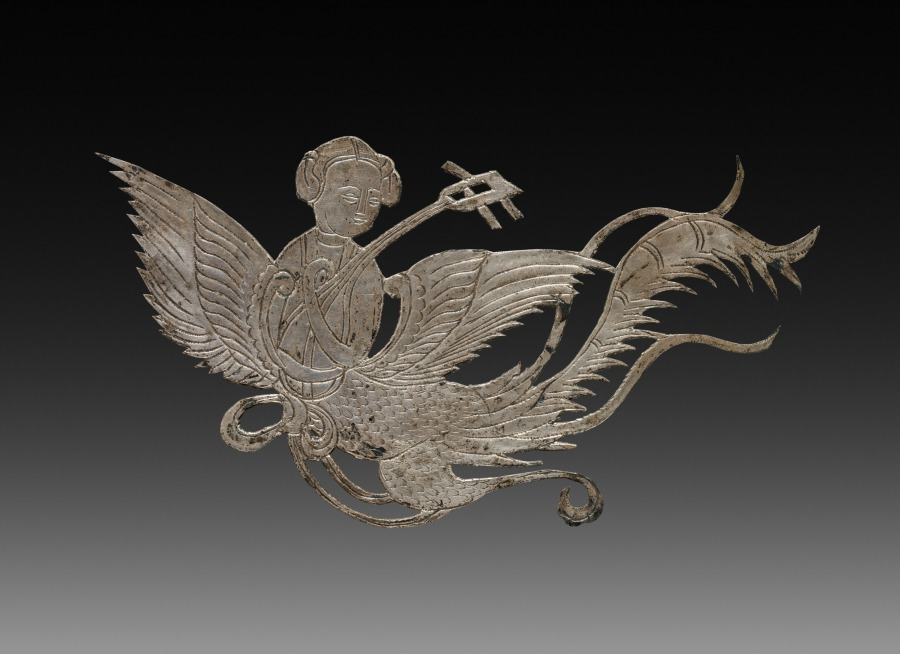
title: Inlay for a Mirror or Box: Lady and Mandolin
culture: China, Tang dynasty (618-907) - Song dynasty (960-1279)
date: c. 900–1000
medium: beaten silver with chased details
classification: Metalwork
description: The p'ing-t'o technique of inlaying gold and silver foil on lacquer produced luxurious articles of elegance and fragility. These stray silver inlays were originally mounted on a mirror back or a cosmetic box whose lacquered surface has disintegrated. They combine auspicious symbols of Indian and Chinese origin--human-headed birds whose melodies filled the Buddhist paradise, and bird-riding deities who inhabited the skies of Taoist mythology. Like these imaginary beings, the lions were probably paired in a radial design; at least one has been lost.